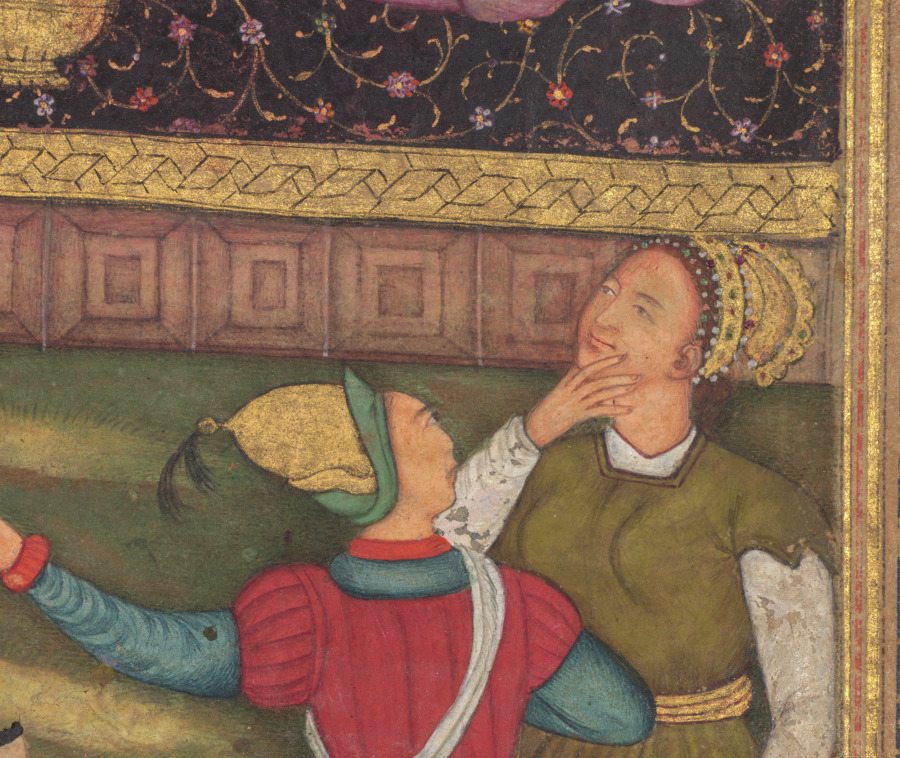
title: The Annunciation (folio 15 recto), from a Mirror of Holiness (Mir’at al-quds) of Father Jerome Xavier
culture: Mughal India, Allahabad, made for Prince Salim (1569–1627)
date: 1602–4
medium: Gum tempera, ink, and gold on paper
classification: Manuscript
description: Mary gazes down at the angel Gabriel as he kneels reverently, like a humble messenger, delivering the news that Mary will give birth to the son of God. His multicolored wings are forced within the boundary line of the painting field, visually implying a sense of subordination. Unlike many of the paintings in the Mirror of Holiness, the Annunciation is a familiar subject in European art, but the emphases vary. The Indian version depicts her as a queen, with a crown held above her head and attendants standing by.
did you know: The text states that Mary was only age 13 1/2 when the angel Gabriel came to her.